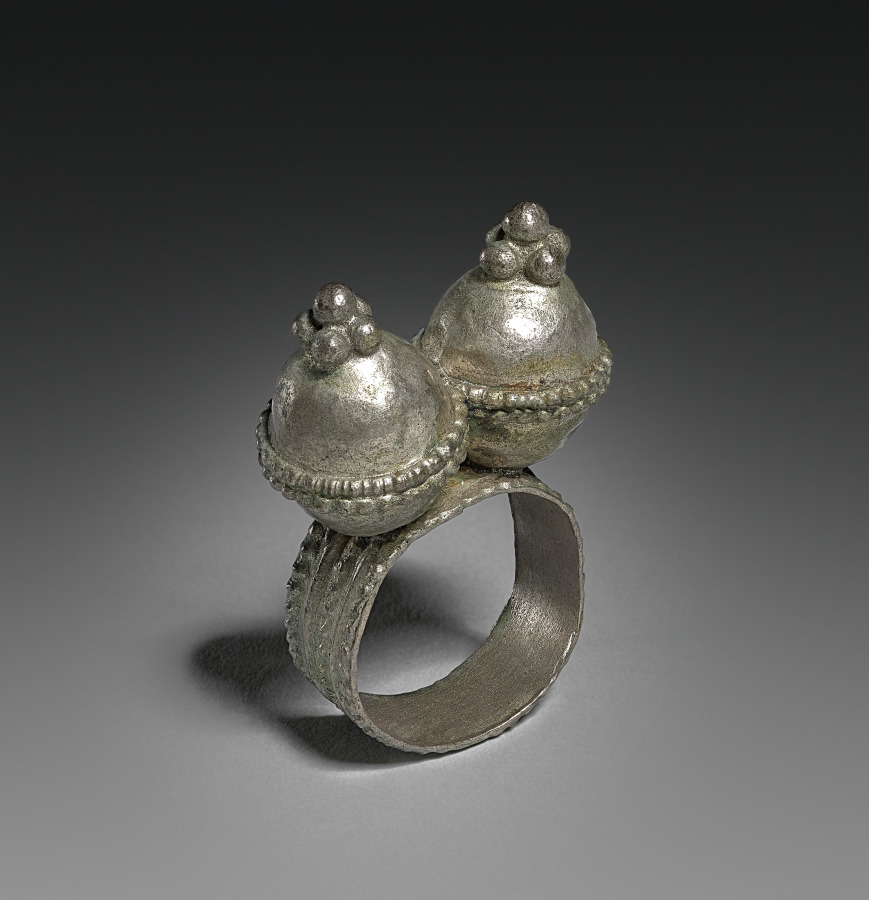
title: Ring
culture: India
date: early 1900s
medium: silver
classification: Jewelry